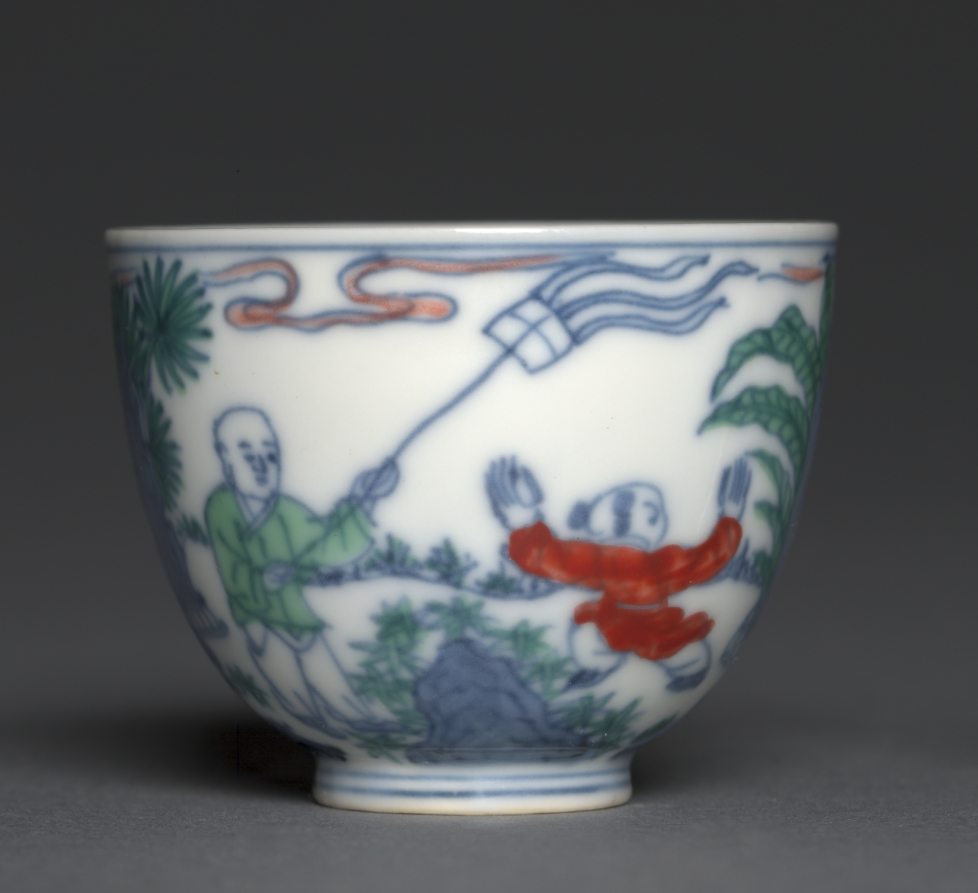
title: Wine Cup with Children at Play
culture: China, Jiangxi province, Jingdezhen, Ming dynasty (1368-1644), Chenghua mark and period (1465-1487)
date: 1465–87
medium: porcelain with underglaze blue and overglaze enamel decoration, docai ("joined colors") ware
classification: Ceramic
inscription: 大明成化年製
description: This delicate wine cup, only two inches high, exhibits free, spontaneous drawing as well as perfect compositional balance over its small surface area. The motifs were outlined with cobalt blue; the piece was then glazed and fired in the normal way for making the blue-and-white ware. After firing, the outline painting was completed with colored enamels over the glaze. The piece was fired the second time. The pictorial decoration is refined and complicated; the porcelain body is of exceptionally high quality and is thin, translucent, and light in weight.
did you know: Chenghua ware demonstrates one of the high points of technological accomplishment in Chinese porcelain production.